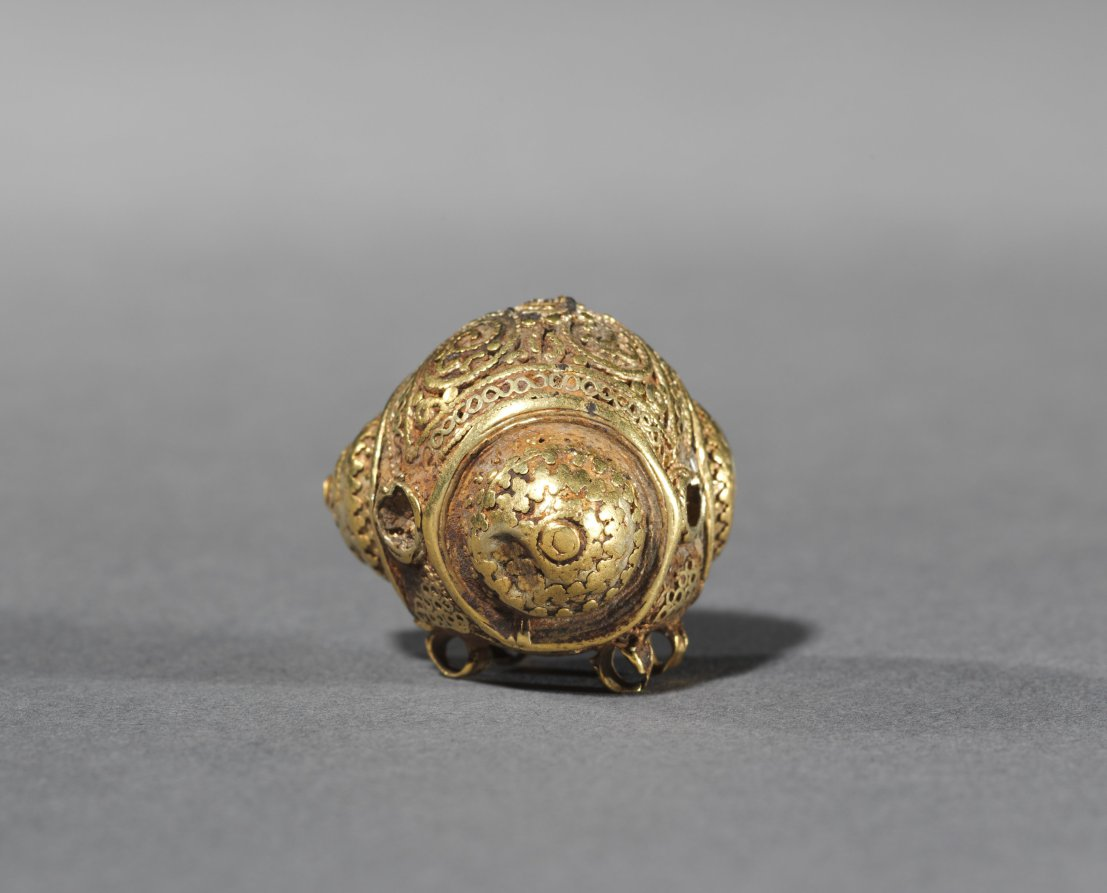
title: Button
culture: Iran, 10th-11th century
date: 900s–1000s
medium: gold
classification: Jewelry